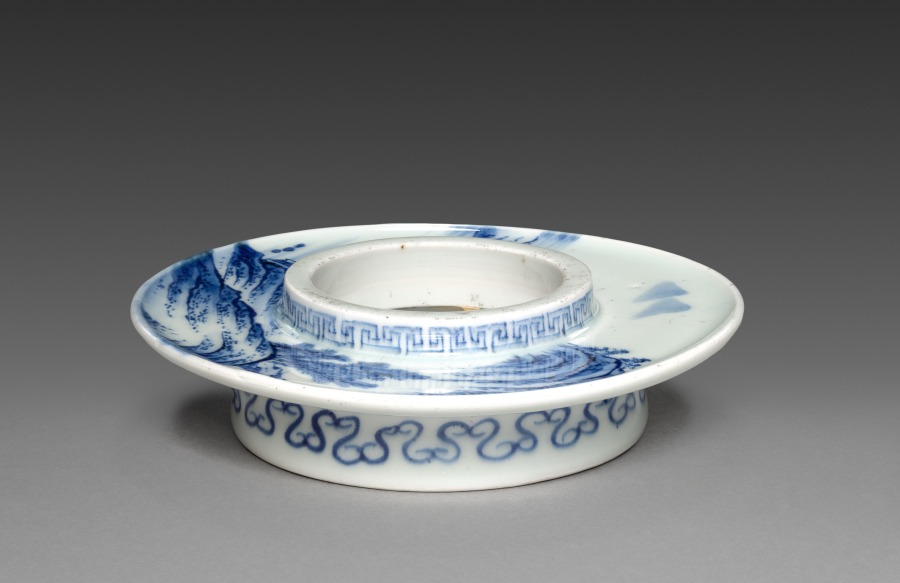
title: Cup Holder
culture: Japan, Edo period (1615–1868)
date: early to mid-1800s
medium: porcelain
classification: Ceramic